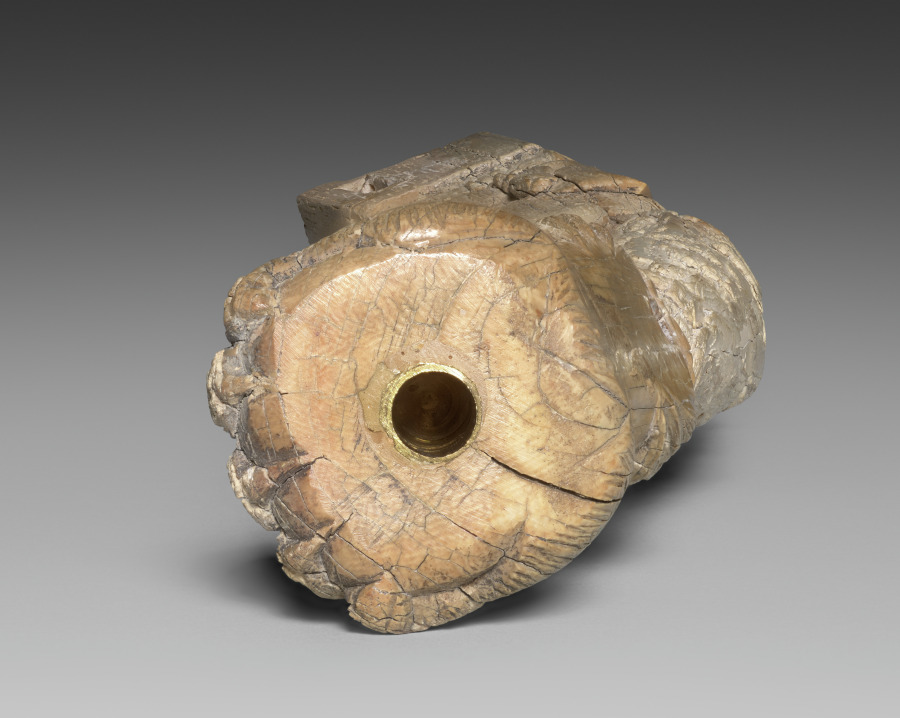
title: Chair Leg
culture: Afghanistan, Begram, Kushan period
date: 300s CE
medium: ivory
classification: Ivory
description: This ivory carving was made to sheath wooden furniture made in India for trade along the Silk Road, which stretched from Rome to China. Indian ivory-faced furnishings--along with lacquer boxes from China and painted glass from Rome--were found in an extraordinary deposit of luxury goods at a site called Begram. The wood on which the ivory and lacquer were affixed has long disintegrated, and only the small pieces remain.